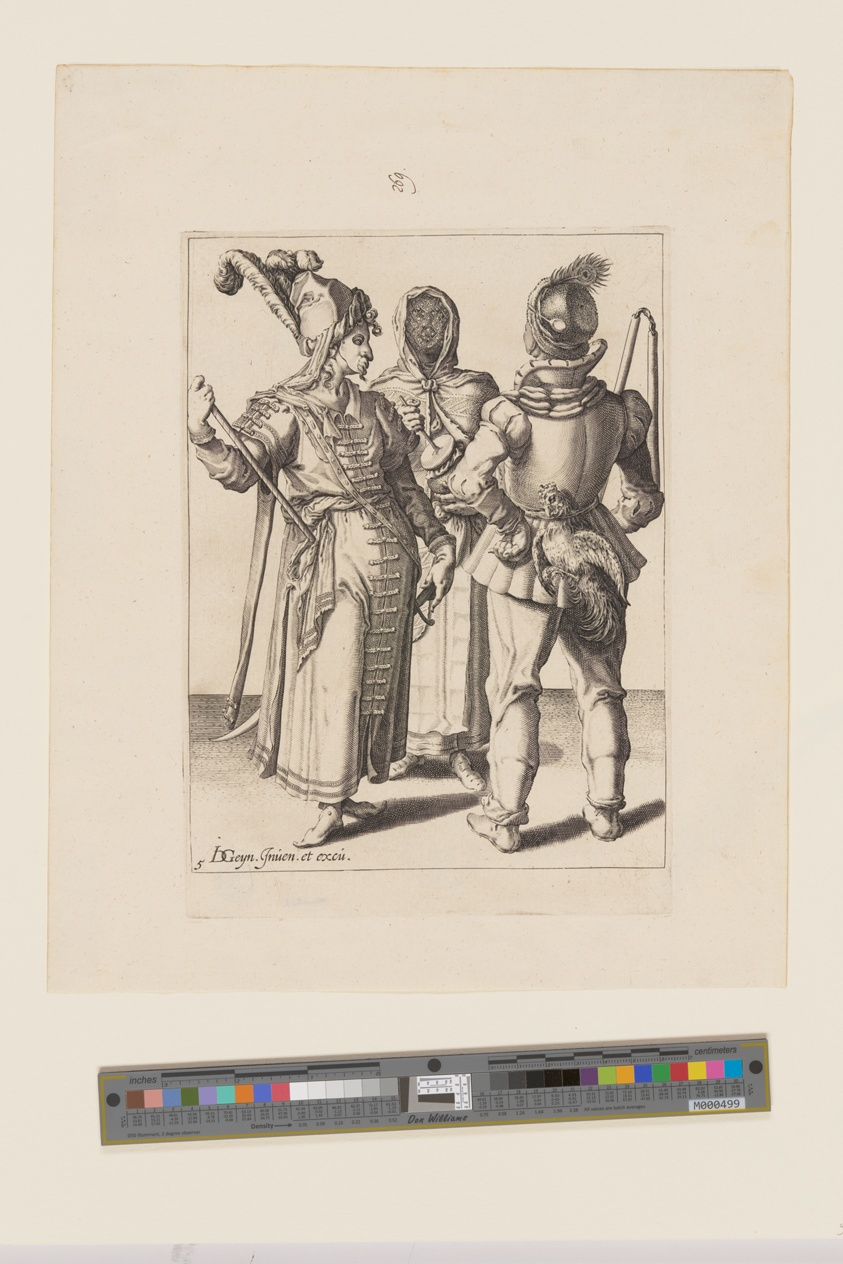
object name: Print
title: A Grandee in Eastern Dress, a Man with a Cock attached to his Belt and a Veiled Woman Playing the Rumbling-Pot, from The Masquerades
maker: Jacques de Gheyn II; Dutch, 1565–1629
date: 1595-96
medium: Engraving on ivory laid paper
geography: Netherlands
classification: engraving; paper; print; prints and drawing